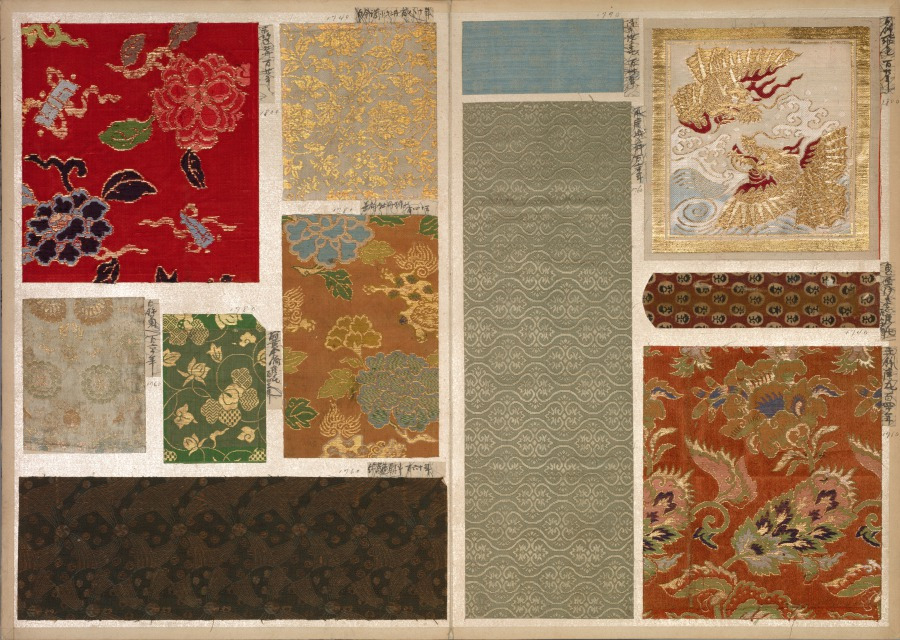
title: Album of Textile Samples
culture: Japan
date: 1790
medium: silk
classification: Textile